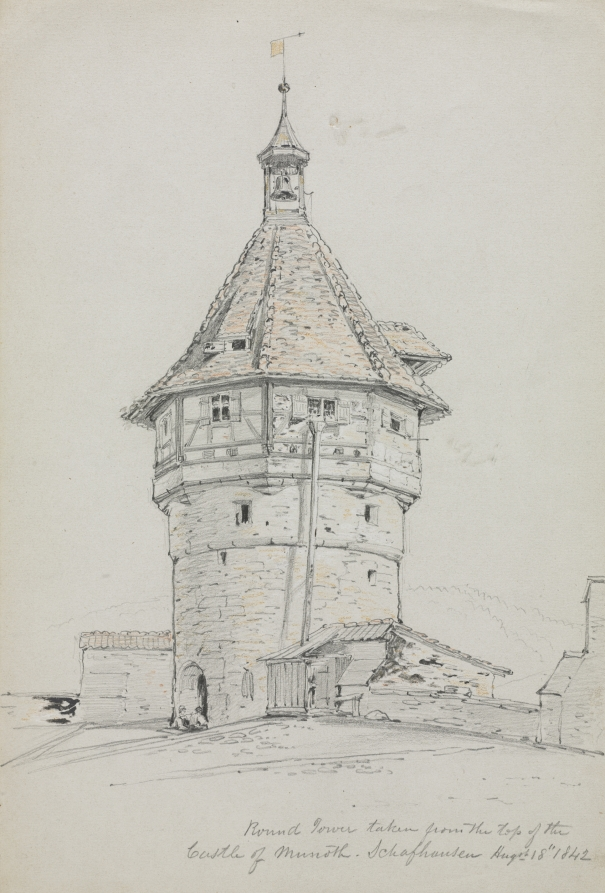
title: Round Tower, Castle of Munoth, Schafhausen, Switzerland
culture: America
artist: John William Casilear (American, 1811–1893)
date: 1842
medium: graphite and orange and yellow crayon, with traces of black and white paint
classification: Drawing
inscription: by artist, lower right, in graphite: Round Tower taken from the top of the Castle of Munoth. Schafhausen Augst 18" 1842 ; verso, by unknown hand, upper left, in blue ink: 9E[illegible][crossed out in graphite] no 3 ; different hand, upper left, in graphite: swiss / 50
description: Casilear began his career as an engraver but shifted to landscape painting at the suggestion of his friend, the painter Asher B. Durand (1796–1866). He made this drawing while traveling in Europe with Durand and another New York landscape painter, John Frederick Kensett (1816–1872).